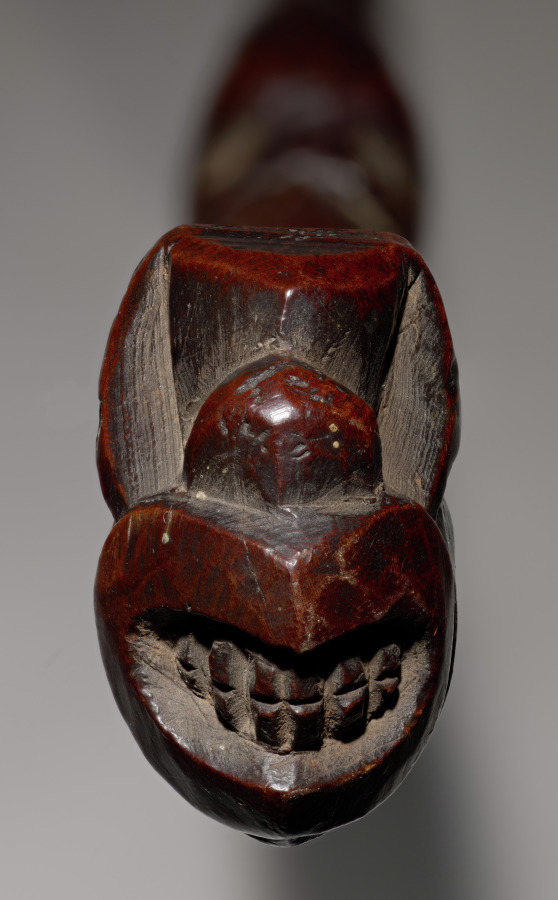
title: Short Club (Wahaika)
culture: Polynesia, New Zealand, Maori people, mid-19th Century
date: mid 1800s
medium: wood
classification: Sculpture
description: The wahaika, carried in a belt, was used by the Maori in hand-to-hand combat. Early, undecorated clubs were made of stone. Bone and wood clubs were decorated with increasingly complex carved designs. The small figure clinging to the side of this club may well represent the supernatural power (mana) of the weapon, while the face at the end of the grip expresses the aggression of combat.